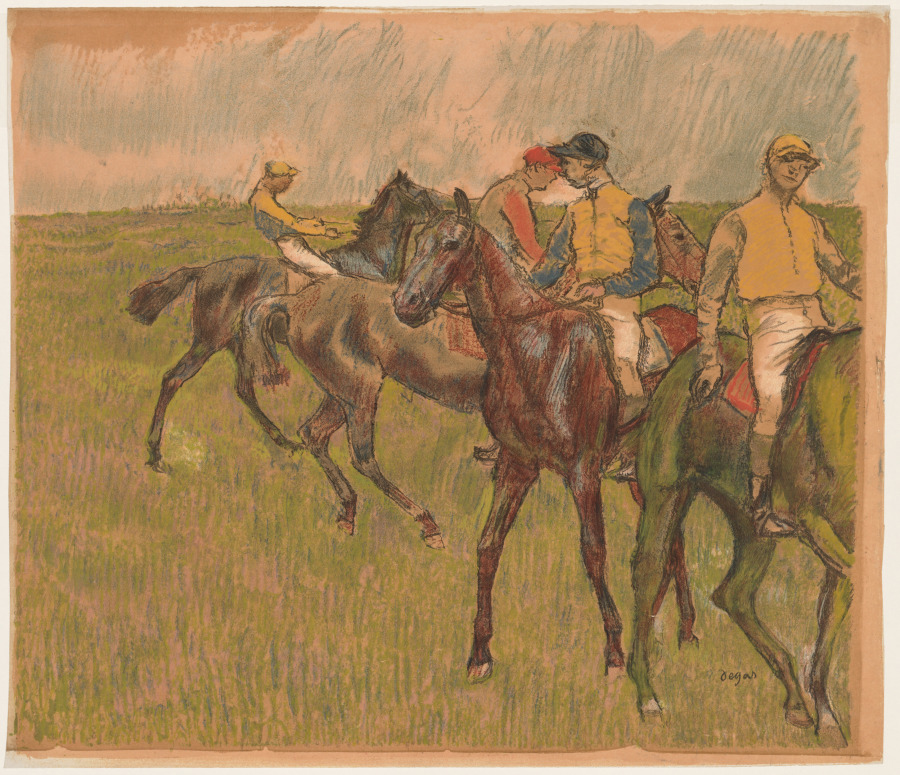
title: Race Horses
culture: France, 19th-20th century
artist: Auguste Clot (French, 1858–1936)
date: c. 1889–1936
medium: color lithograph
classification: Print